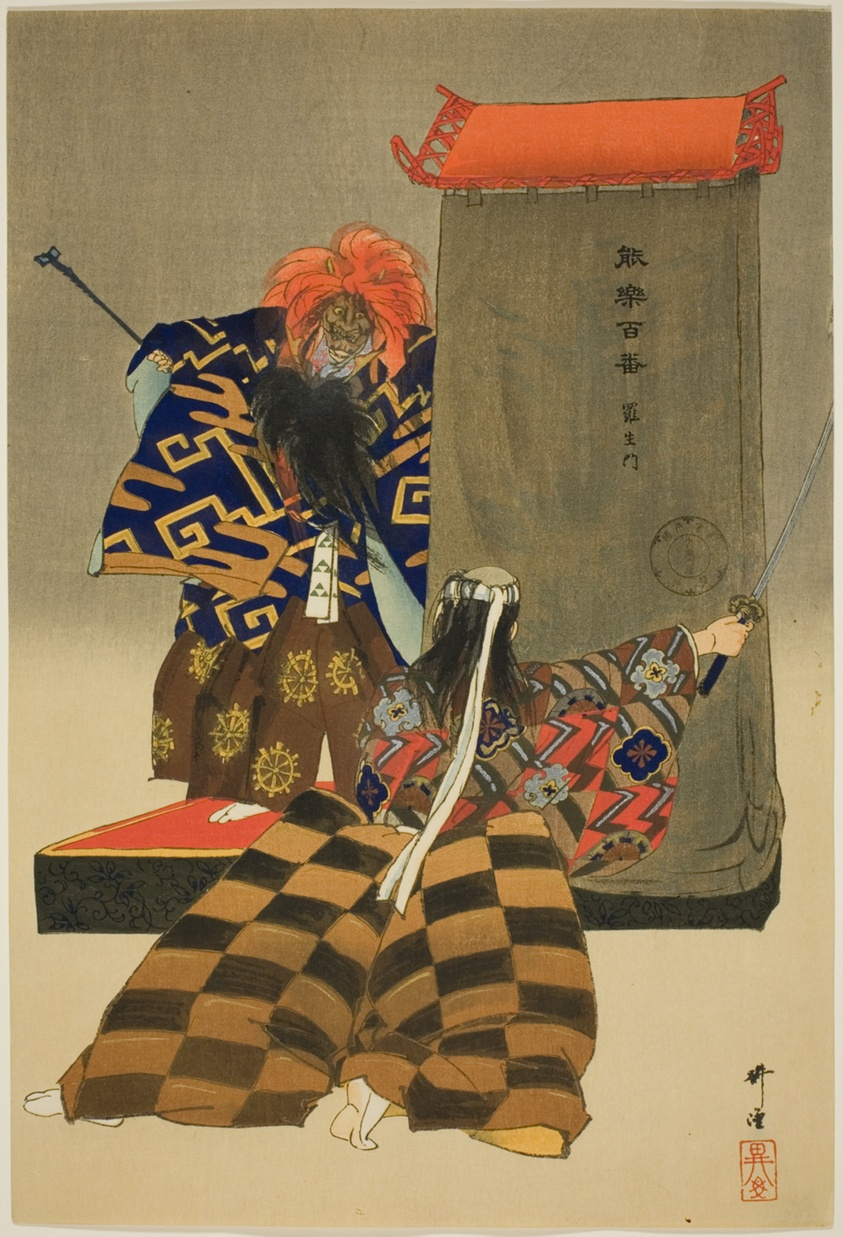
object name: Print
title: Rasho-mon, from the series "One Hundred No Dramas (Nogaku hyakuban)"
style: Japanese (culture or style)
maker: Tsukioka Kogyo; Japanese, 1869-1927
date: 1898/1903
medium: Color woodblock print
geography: Japan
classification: woodblock print; print; asian art